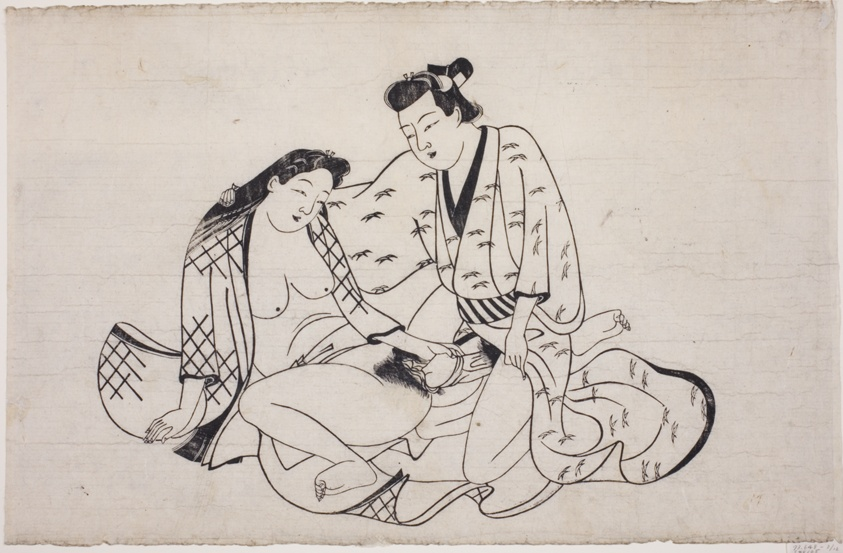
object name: Print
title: A sheet from a shunga album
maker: Japanese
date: 1679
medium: Woodblock print; sumizuri-e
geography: Japan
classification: print